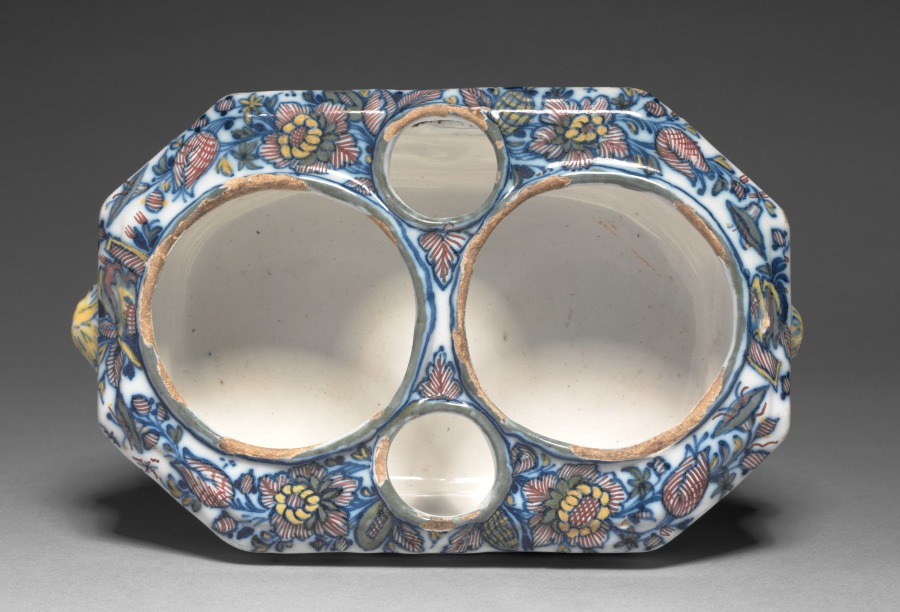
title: Cruet Stand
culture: France, Marseilles, 18th century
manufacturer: Héraud- LeRoy Factory (French)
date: c. 1740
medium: Tin- glazed earthenware (faience) wth underglaze blue decoration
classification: Ceramic